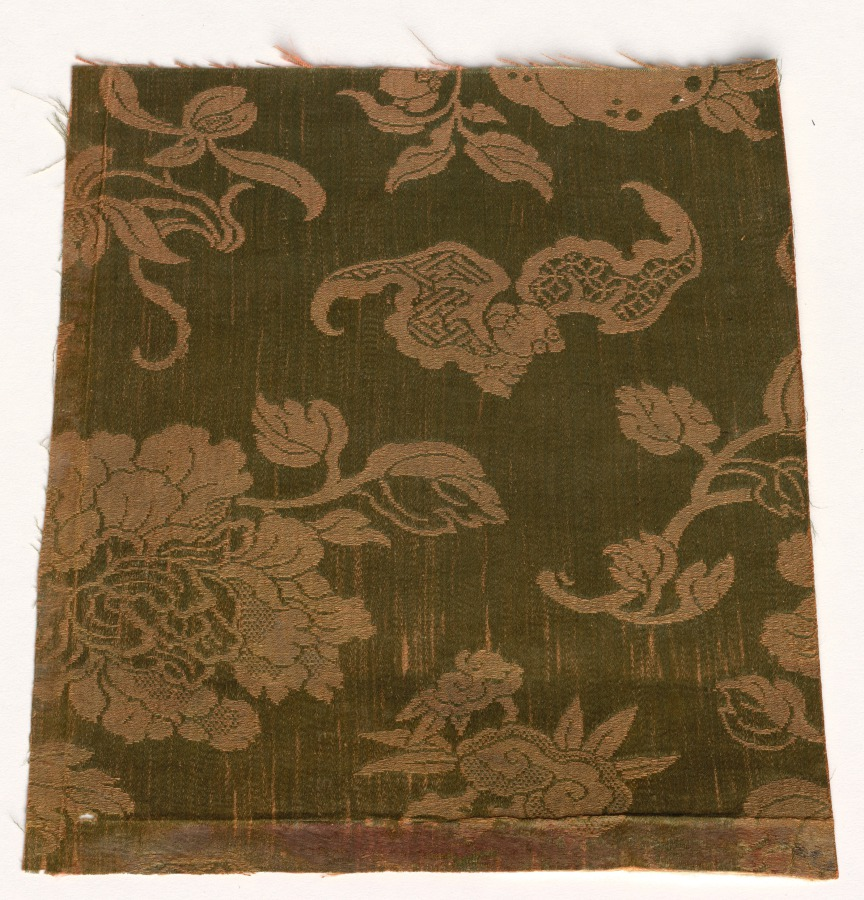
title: Textile Fragment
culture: Japan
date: 1800s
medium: silk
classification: Textile